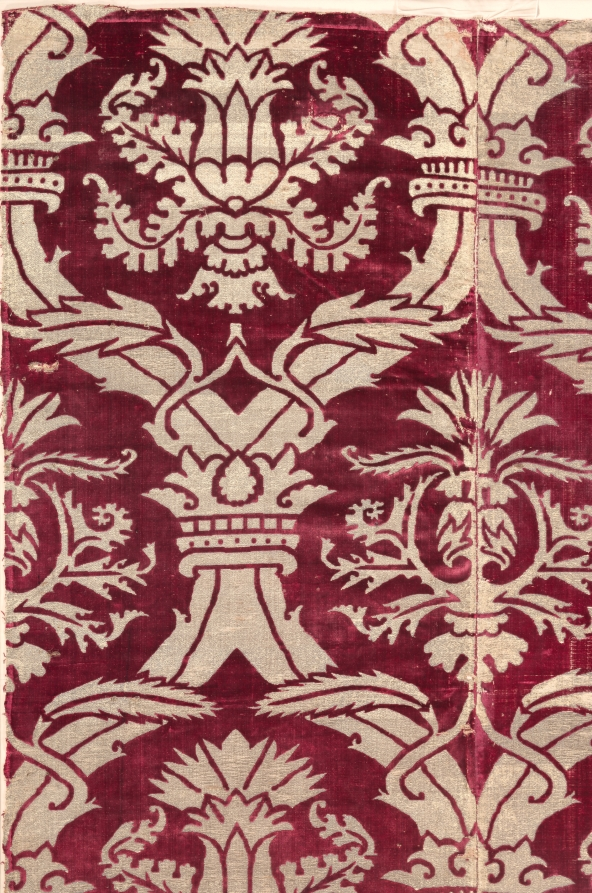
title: Brocaded Velvet Panel with Italianate Pattern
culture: Turkey, Istanbul or Bursa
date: 1575–1625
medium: Silk: velvet, brocaded; gilt-metal thread and cotton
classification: Velvet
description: Rarely are four fabric widths preserved together from any culture. This gilt-metal thread pattern combines Turkish and Italian features: the large ogival (curved) lattice clasped by crowns and the velvet structure are Turkish, and the two so-called artichoke designs are enlarged adaptations of Italian motifs. A symbol of wealth and power, this velvet panel was woven during the artistic height of the Ottoman Empire in the late 1500s. It may have covered a divan (sofa) or possibly enhanced a wall during cold winters in the imperial Topkapi Palace in Istanbul.